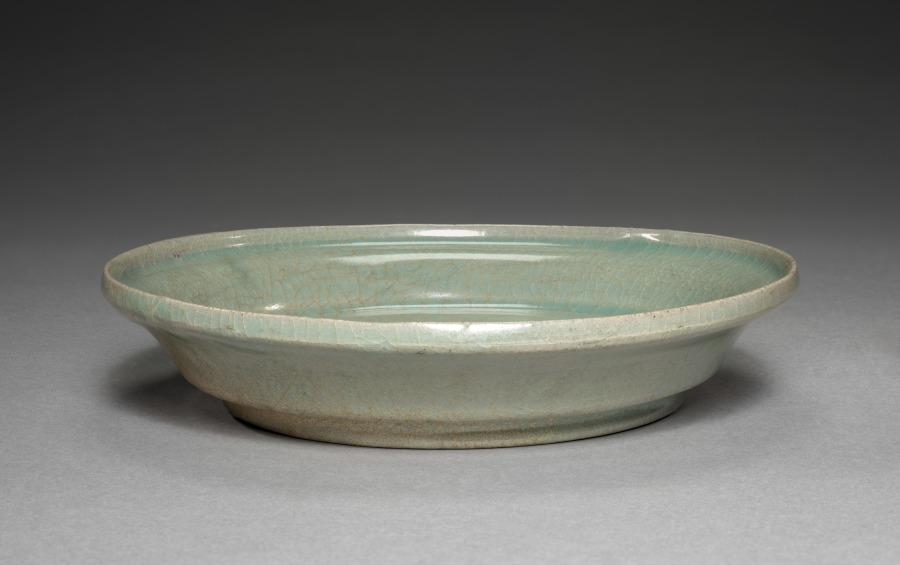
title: Saucer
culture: Korea, Goryeo dynasty (918–1392)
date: 1100s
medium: pottery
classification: Ceramic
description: As early as the seventh century, the practice of drinking tea and wine became an important part of elite culture in Korea. Elites of the Goryeo period commissioned a variety of types of utensils and vessels including this saucer paired with a large bowl, to make their drinking experience more exciting.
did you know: The crackle pattern that appears all over this saucer was caused by a thermal expansion mismatch between the body and the glaze.